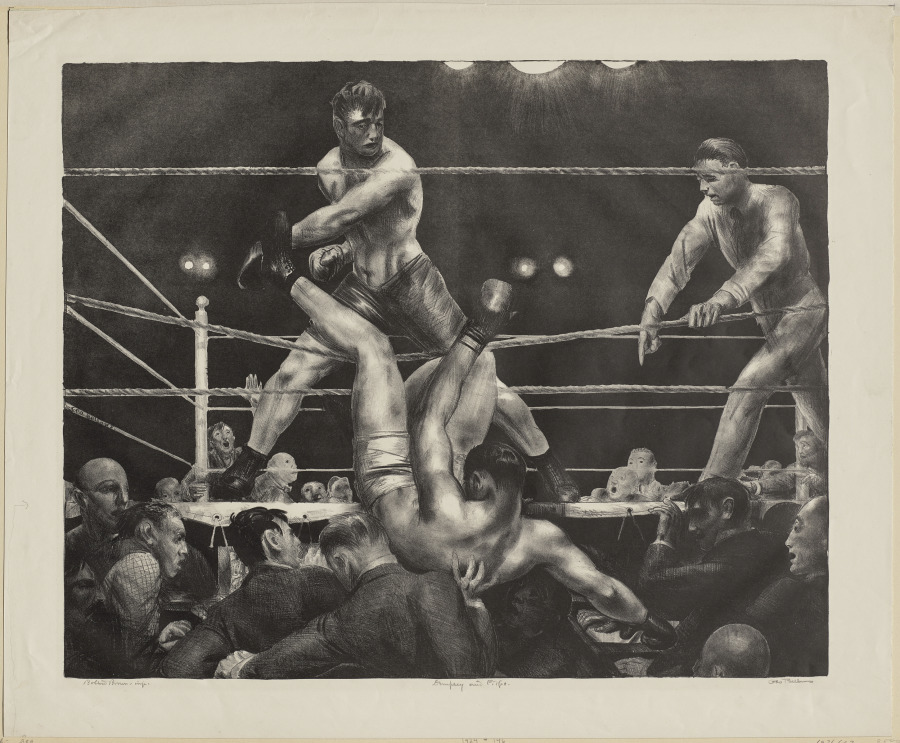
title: Dempsey and Firpo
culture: America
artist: George Bellows (American, 1882–1925)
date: 1924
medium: lithograph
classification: Print